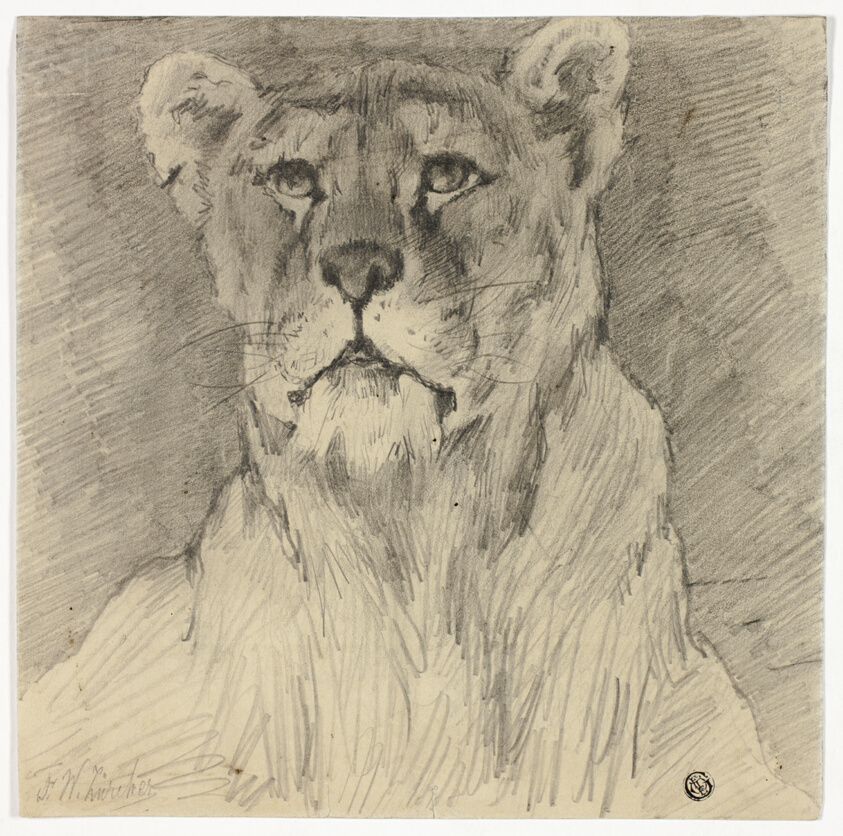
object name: Drawing and Watercolor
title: Front View of Seated Lioness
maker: Frederik William Zurcher (Dutch, 1835-1894)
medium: Graphite on cream wove paper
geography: Holland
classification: graphite; drawings (visual works); prints and drawing